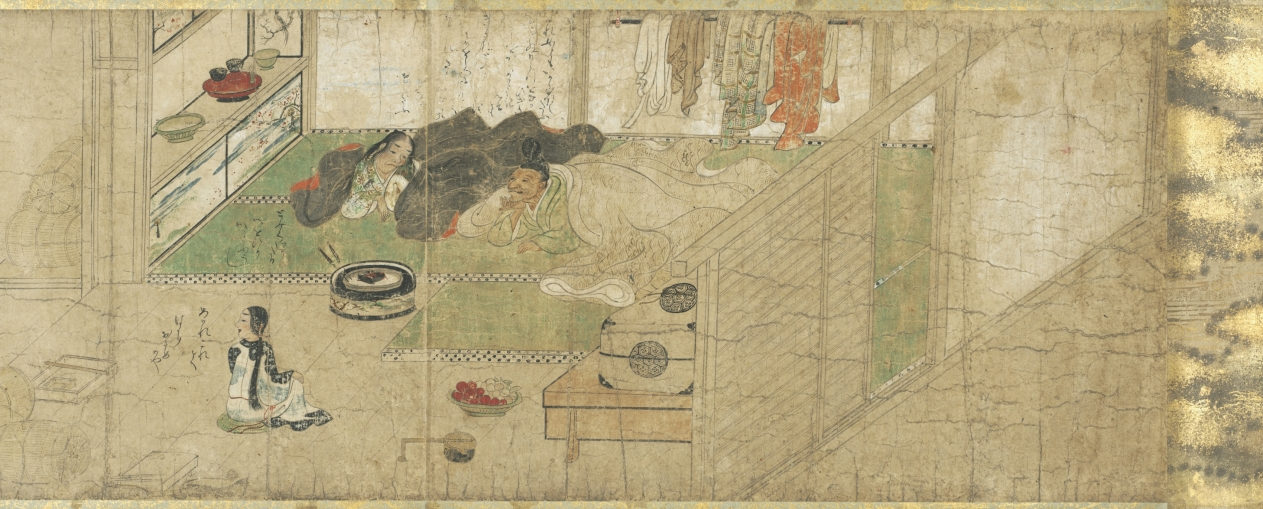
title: The Story of Fukutomi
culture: Japan, Muromachi period (1392–1573)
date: mid-1400s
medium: Handscroll; ink and color on paper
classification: Painting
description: This handscroll shows the second half of an odd tale in which a ne’er-do-well seeks the path to quick fortune and learns the art of musical flatulence. Prior to a major performance, a mentor (and competitor) advises him to consume morning glory seeds, a laxative. Thus, while performing he fouls himself and ends his days in humiliation. The audacious nature of this story and its presentation—well-animated figures with dialogue adjacent to the appropriate moments of action—create a primitive graphic novel. Japanese visual humor about farting preceded this story, but the satirical, mean-spirited twist in this tale suggests its intent was not merely to be humorous. The story was likely commissioned by court officials who disapproved of common performers rising to high positions, outflanking what was the accepted social order.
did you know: This scroll is treasured as the second oldest surviving version of this story.